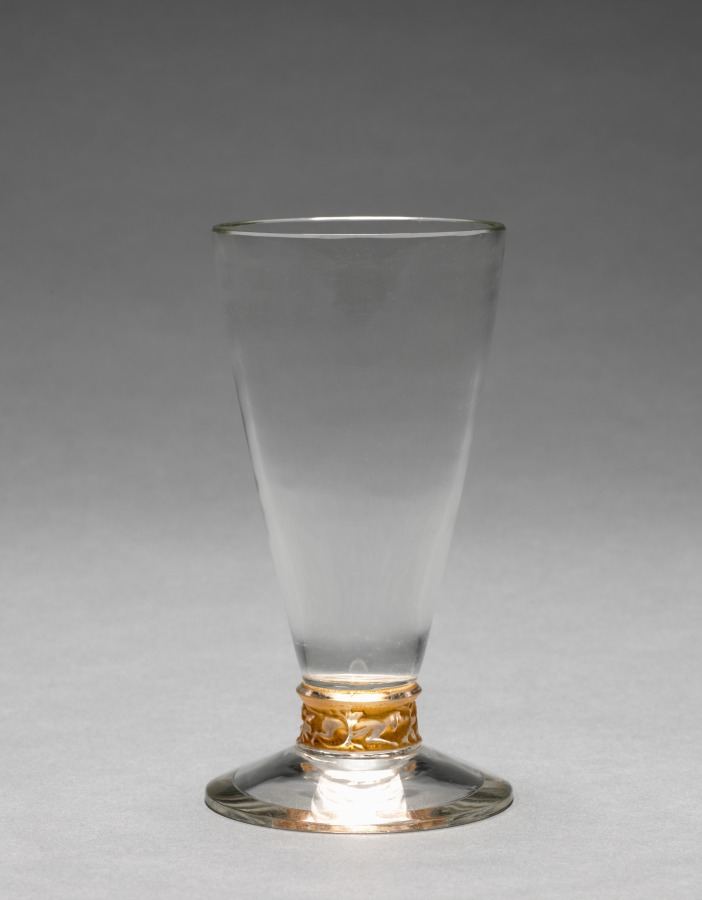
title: Ring of Dogs Footed Water Glass (Verre à pied bague chiens)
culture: France, 20th century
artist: René Lalique (French, 1860–1945)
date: c. 1913–21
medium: glass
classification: Glass